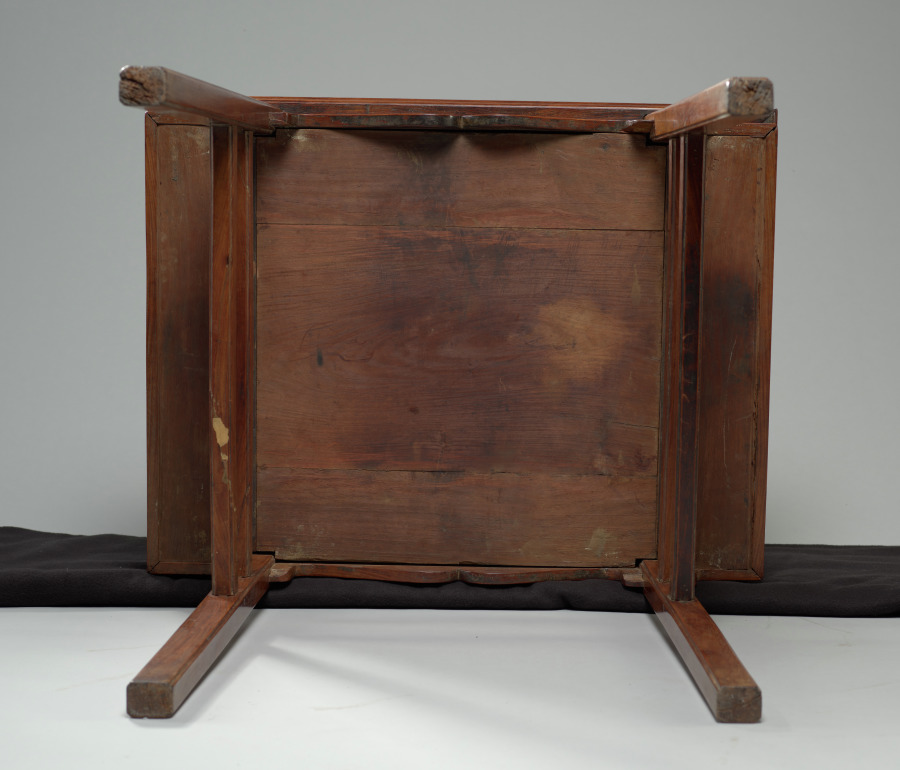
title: Game Table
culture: China, Ming dynasty (1368-1644) - Qing dynasty (1644-1911)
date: 1600s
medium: Rosewood (huanghuali)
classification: Furniture and woodwork